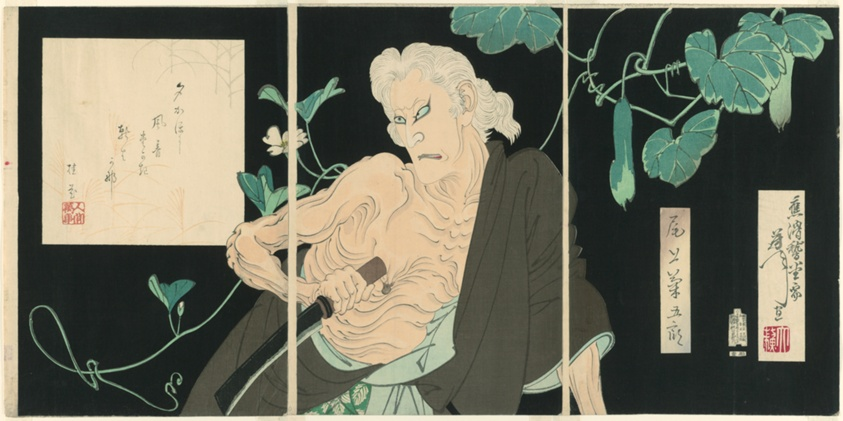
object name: Print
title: Onoe Kikugorō V as the Hag of Asajigahara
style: Japanese (culture or style)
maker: Tsukioka Yoshitoshi (Japanese, 1839-1892)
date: 1890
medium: Color woodblock prints; ōban triptych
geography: Japan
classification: woodblock print; print; asian art